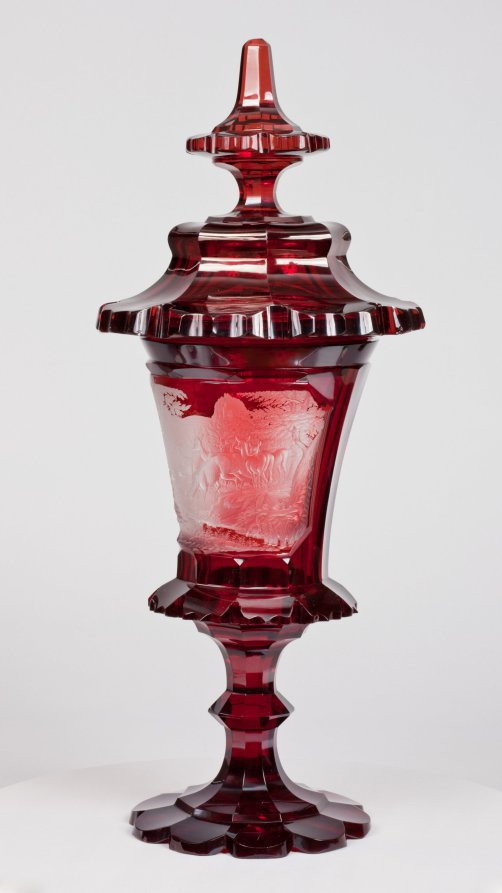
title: Covered Cup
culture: Bohemia, 19th century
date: mid-1800s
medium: ruby glass with engraved decoration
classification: Glass